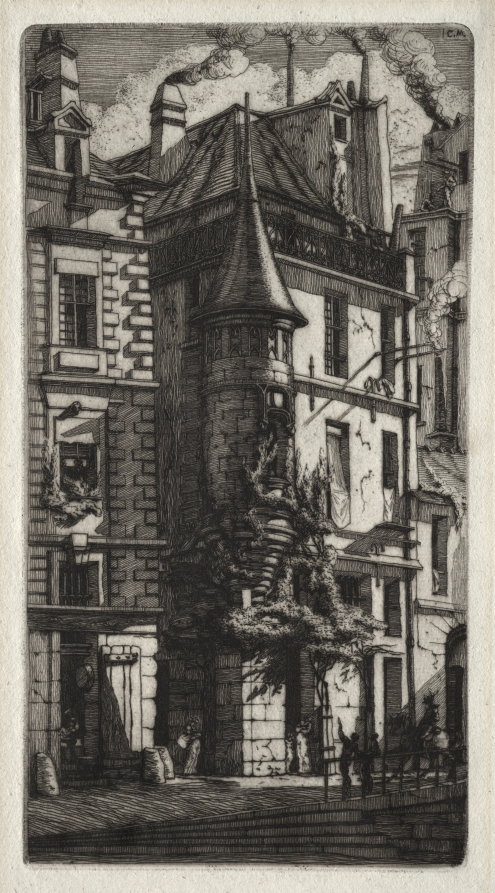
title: Etchings of Paris: House with a Turret, Weavers' Street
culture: France, 19th century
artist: Charles Meryon (French, 1821–1868)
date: 1852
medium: etching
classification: Print